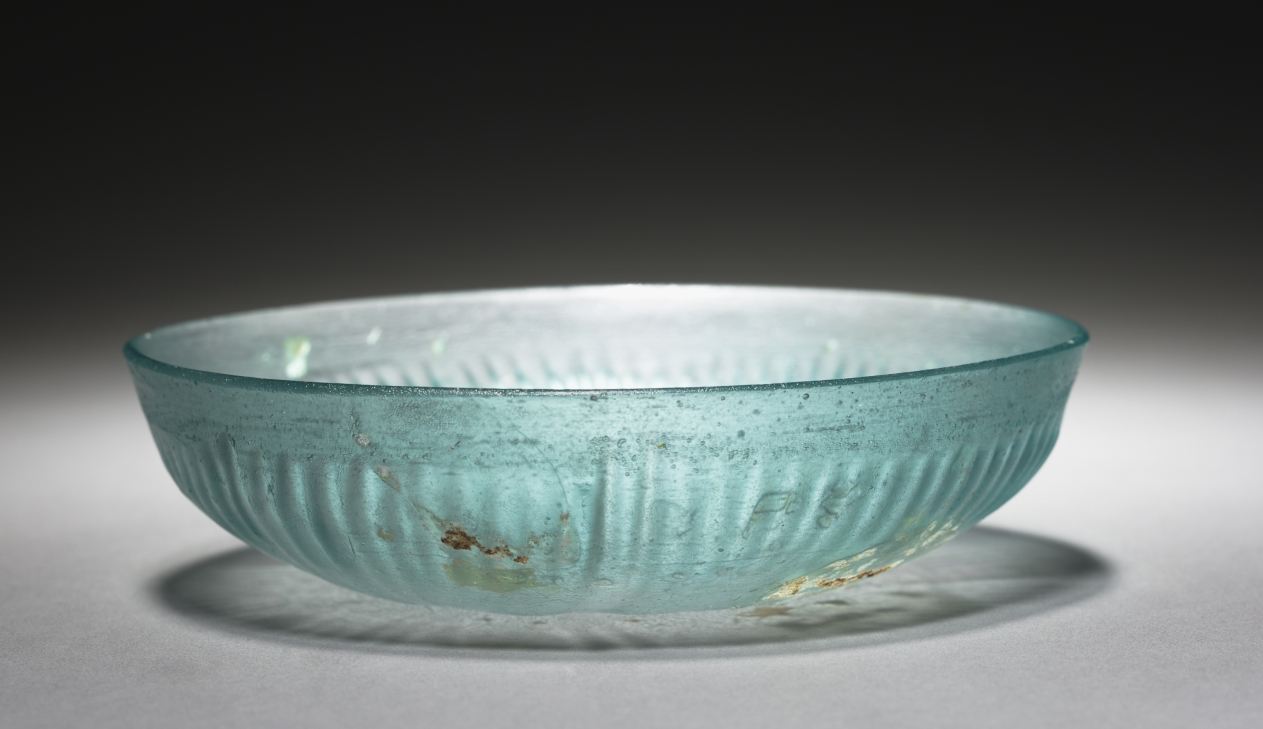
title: Shallow Ribbed Bowl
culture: Roman, Eastern Mediterranean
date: 50 BCE–100 CE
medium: glass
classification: Glass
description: Shallow ribbed glass bowls, often light blue, green, or turquoise in color, are a fairly common ancient glass vessel type. They were likely made by blowing or pressing molten glass into molds, sometimes leaving visible air bubbles within the glass matrix. After cooling, an artisan would rotate the bowl on a wheel or lathe, using a gentle abrasive to smooth out imperfections.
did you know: The Roman shallow ribbed bowl, with central boss, recalls the earlier Greek phiale (libation dish).